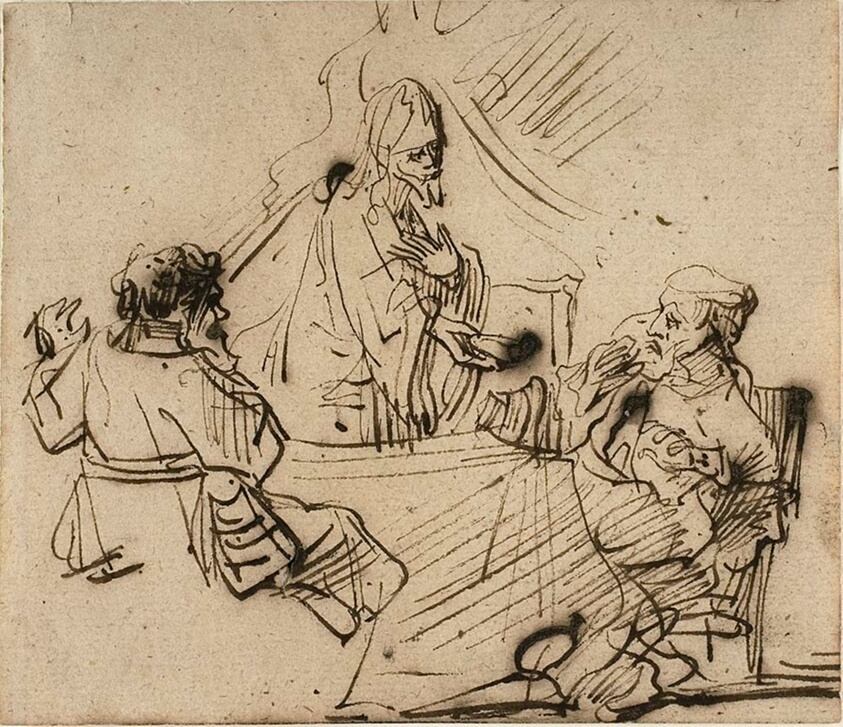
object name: Drawing and Watercolor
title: Joseph's Brothers Showing His Coat to Jacob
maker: Jan Victors (Dutch, 1619-1676)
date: 1640/49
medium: Pen and brown ink, with brush and brown wash, on cream laid paper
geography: Netherlands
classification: pen and ink drawings; drawings (visual works); prints and drawing